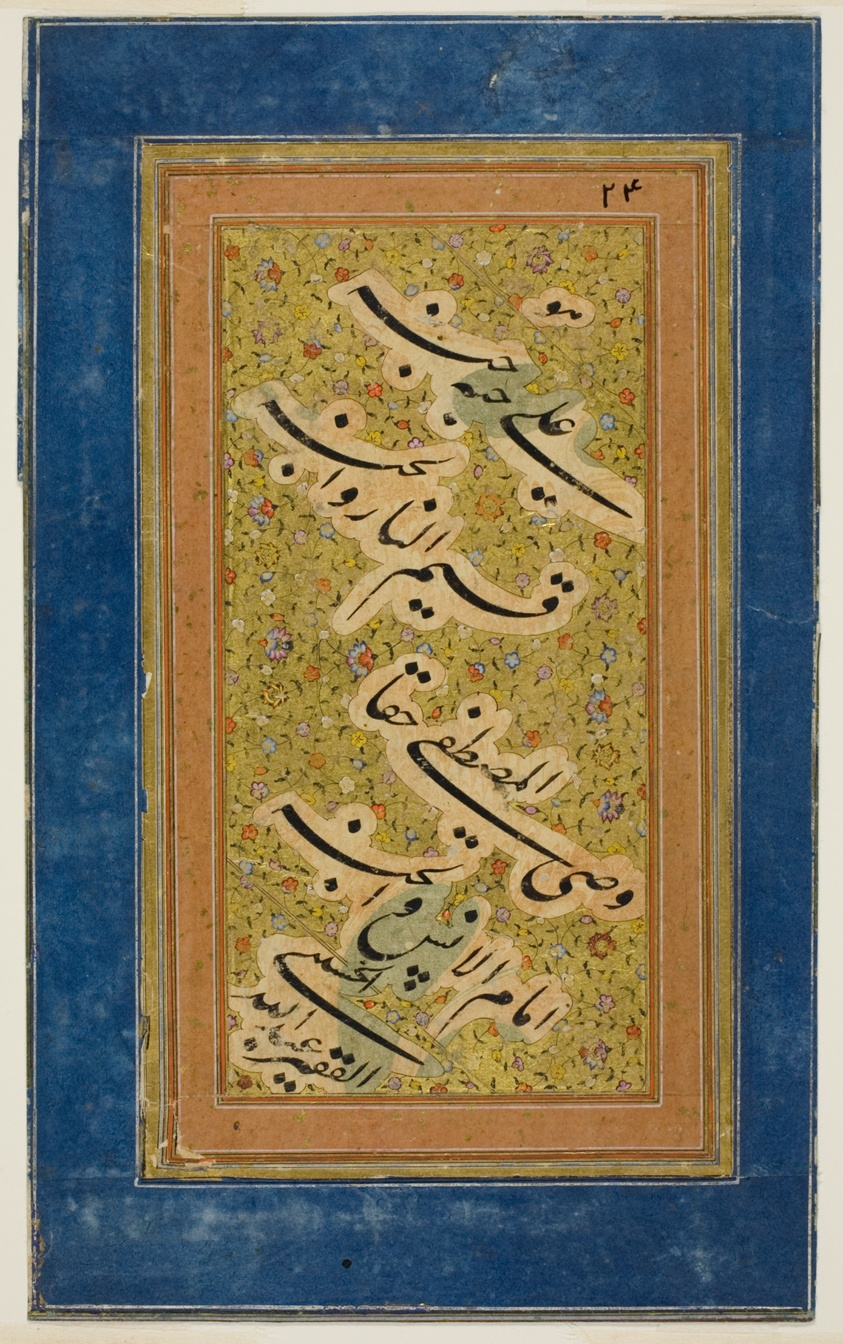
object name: Drawing and Watercolor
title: Poetry Fragment (Qit'a) written in Nasta'liq Script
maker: Iran or India; Signed by 'Abd Allah al-Hasani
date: Safavid dynasty (1501–1722)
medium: Ink, opaque watercolor, and gold on marbled paper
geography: Iran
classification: calligraphy; manuscript; asian art